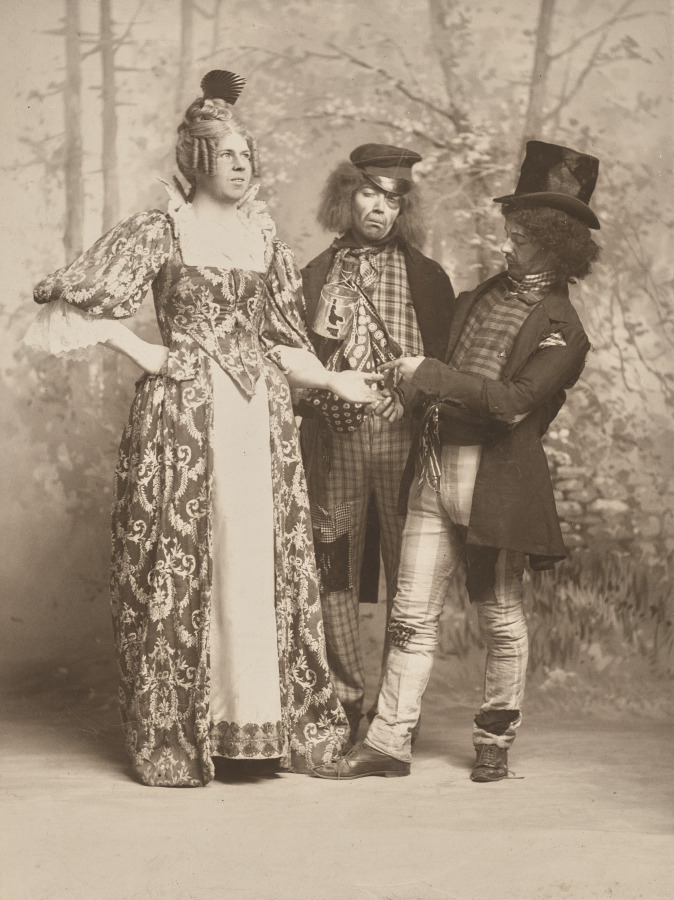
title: Untitled (theatrical scene with 3 figures: the palm reader)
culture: England, 19th century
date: 1880s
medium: woodburytype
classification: Photograph